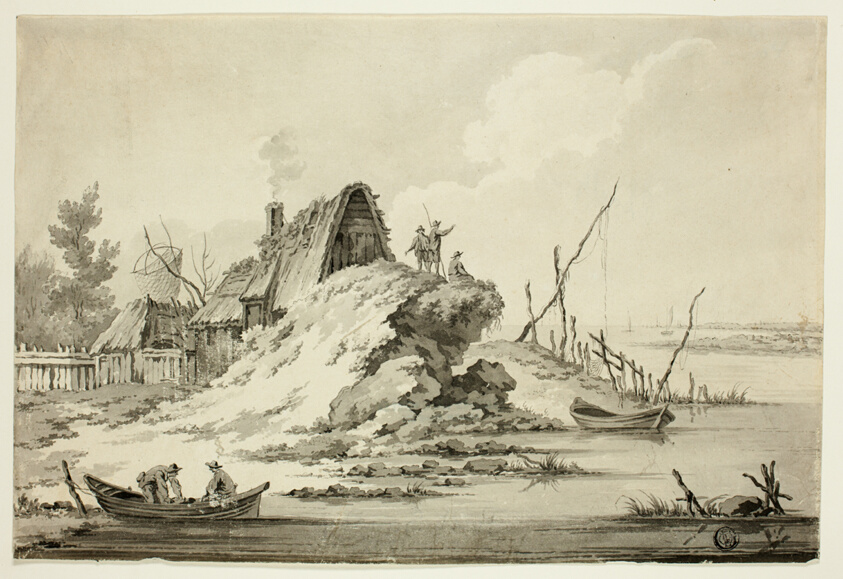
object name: Drawing and Watercolor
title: Rustic Seaside Scene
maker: Possibly Jean-Baptiste Le Prince; French, 1734-1781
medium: Pen and black ink, with brush and gray wash, on ivory wove paper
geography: France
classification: ink or chalk wash; drawings (visual works); prints and drawing